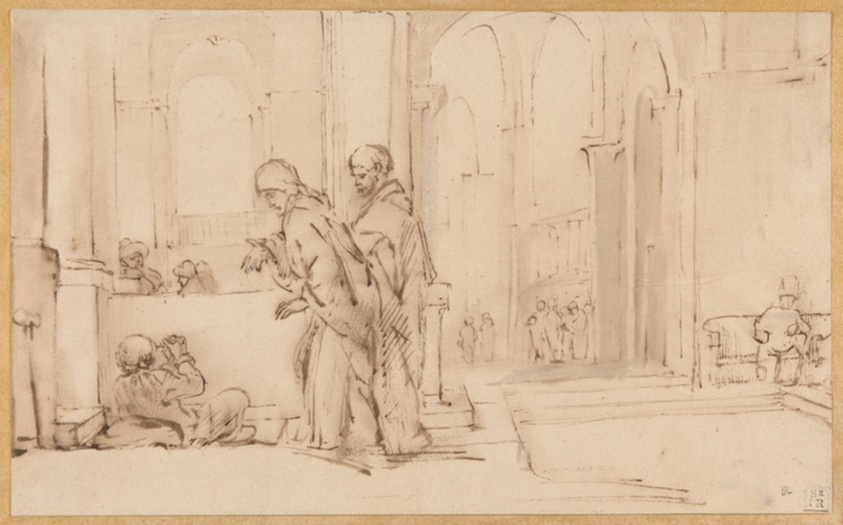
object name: Drawing and Watercolor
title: Peter and John at the Temple Gate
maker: Attributed to Willem Drost; Dutch, 1633–1659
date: 1626/69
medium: Pen and brown ink, with brush and brown wash, on ivory laid paper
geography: Netherlands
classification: pen and ink drawings; drawings (visual works); prints and drawing; paper